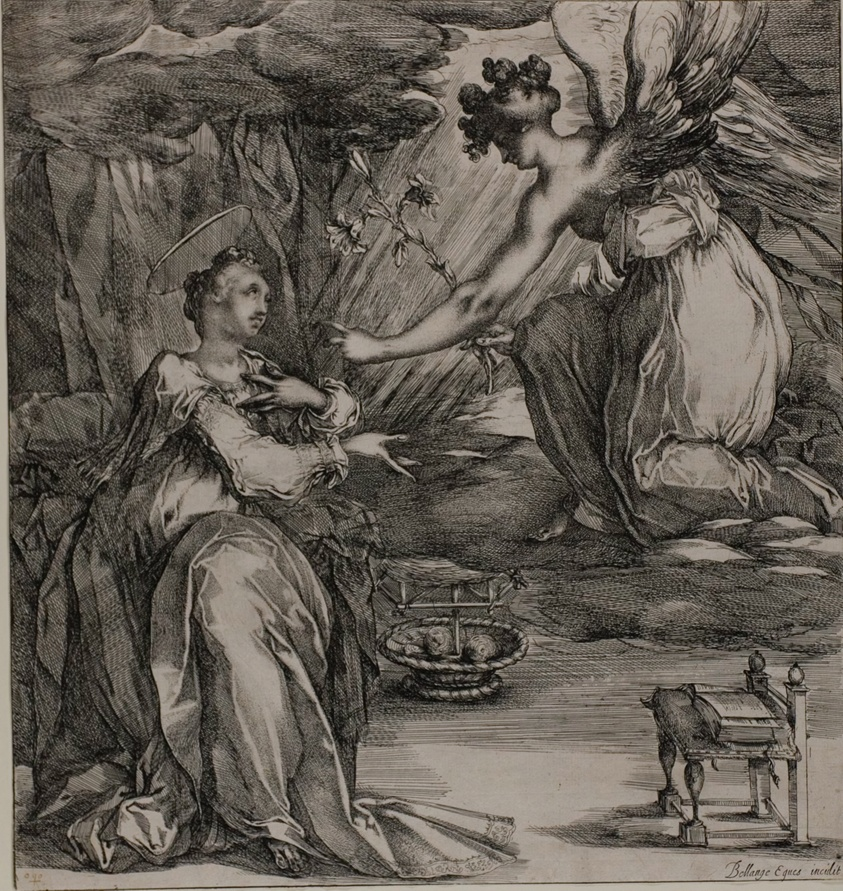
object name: Print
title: The Annunciation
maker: Jacques Bellange (French, c. 1575-1616)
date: 1615–16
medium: Etching, touched with burin printed in black, on off white laid paper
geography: France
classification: etching; print; prints and drawing